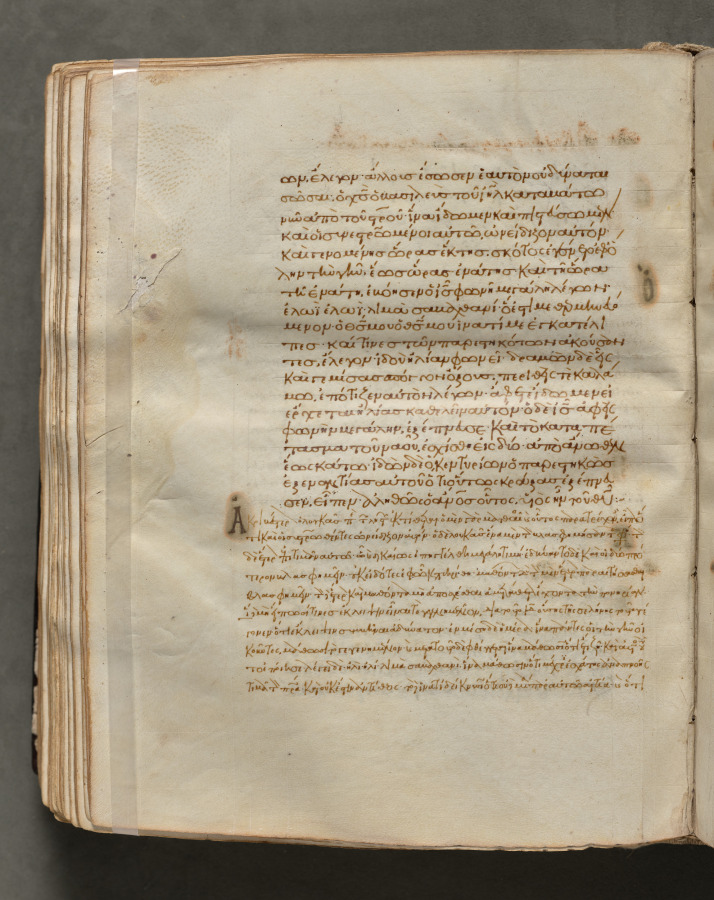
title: Text, folio 194 (verso), from a Gospel Book with Commentaries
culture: Byzantium, Constantinople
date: c. 1000–1100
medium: ink, tempera, and gold on vellum; leather binding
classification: Bound Volume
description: Each of the four gospels in this book opens on a page with brilliantly illuminated borders depicting the author of the text as well as birds-principally peacocks, symbols of the immortality of the soul-and fountains, representing the fountain of life and the salvation of the soul. This volume consists of 428 leaves with texts in Greek. Its level of sophistication suggests that it was probably written and decorated in a monastery in Constantinople.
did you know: Gospel Books were carried in procession through Byzantine churches.